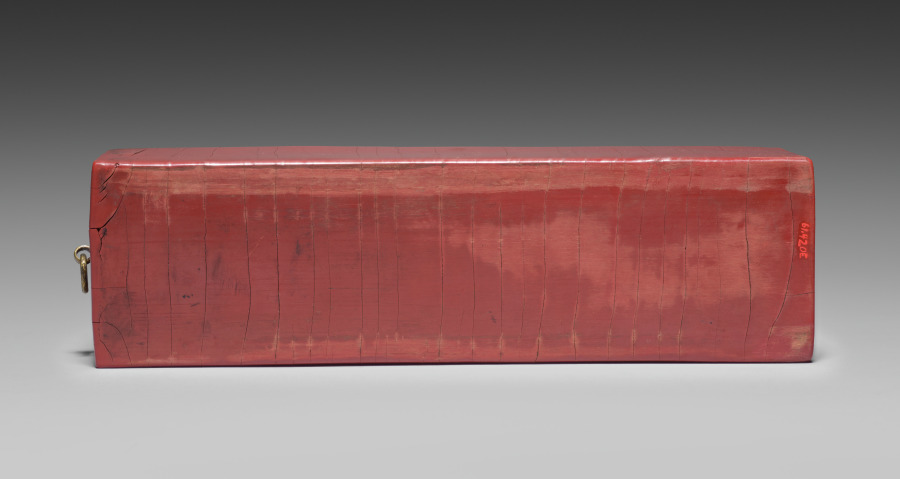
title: Drawer for a Tihong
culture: China, Ming dynasty (1368-1644), Wanli reign (1572-1620)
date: 1585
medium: carved cinnabar lacquer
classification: Lacquer